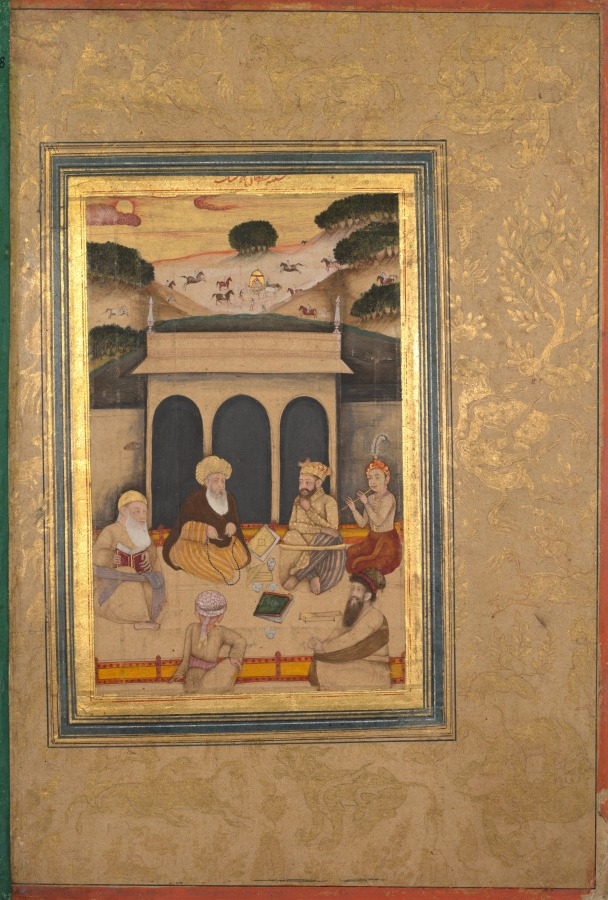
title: Nobleman Visiting Saint at his Shrine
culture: India, Mughal, 17th-18th century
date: 1600s–1700s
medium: color on paper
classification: Painting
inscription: recto, back of sultan: Ali of Mashad, d. 1504